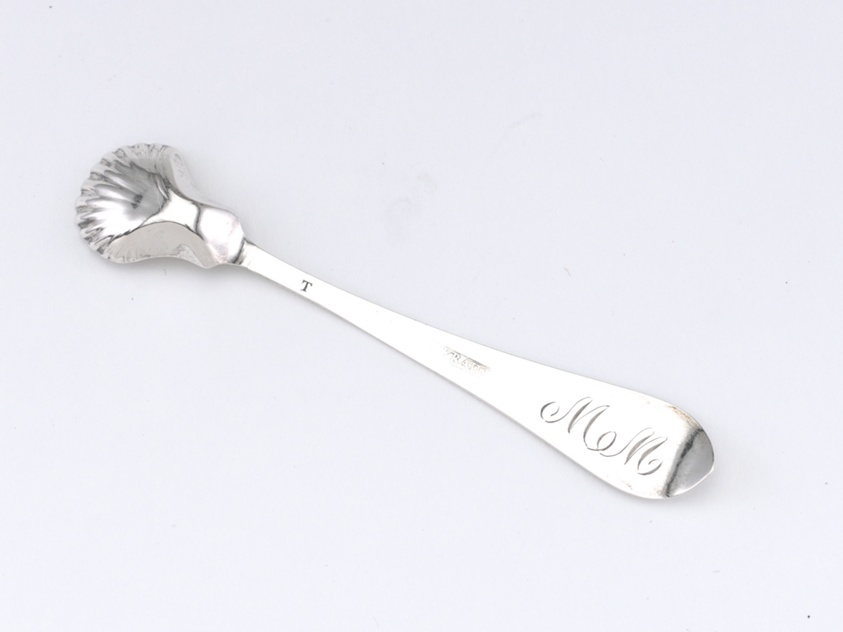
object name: Metalwork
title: Pair of Salt Spoons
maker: John Samuel Krause (American, 1782–1815); Bethlehem, Pennsylvania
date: 1805–15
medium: Silver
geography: Bethlehem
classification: spoon; silver; utensil; american decorative arts; american arts; decorative arts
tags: spoon